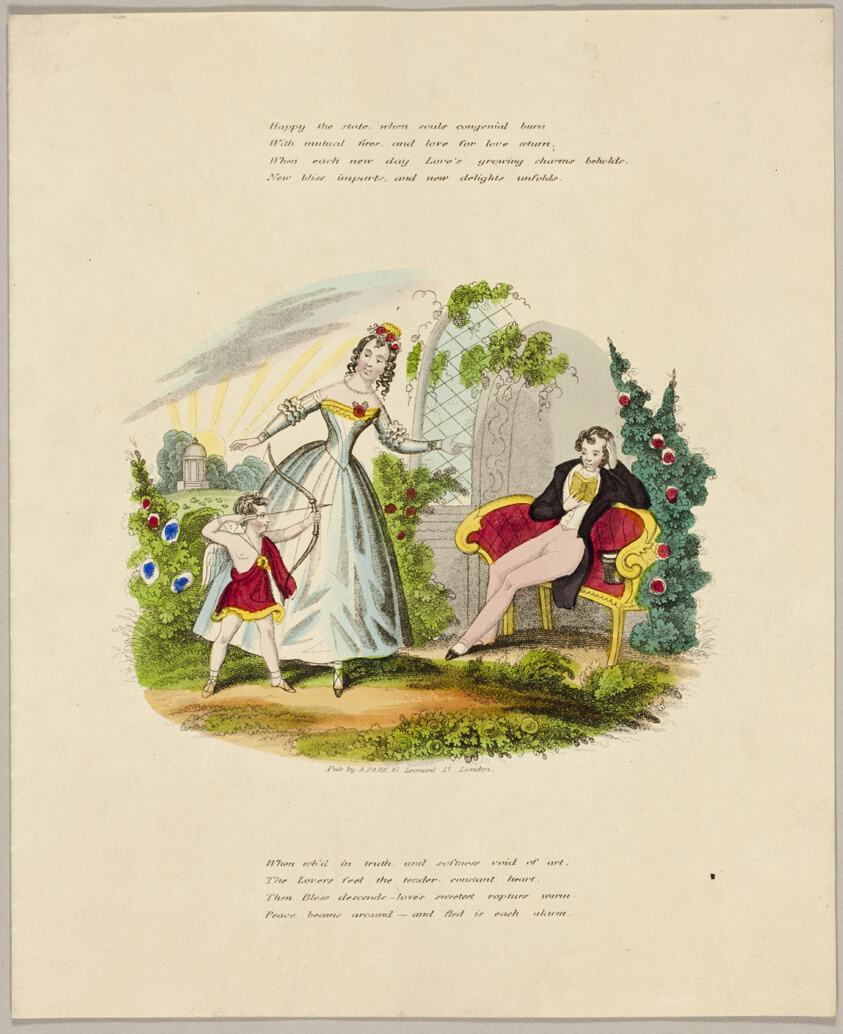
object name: Print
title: Happy the State (valentine)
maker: Unknown Artist (English, 19th century); published by A. Park (English, 19th century)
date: c. 1842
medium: Lithograph with hand-coloring on ivory wove paper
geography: England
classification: valentine; prints and drawing; print